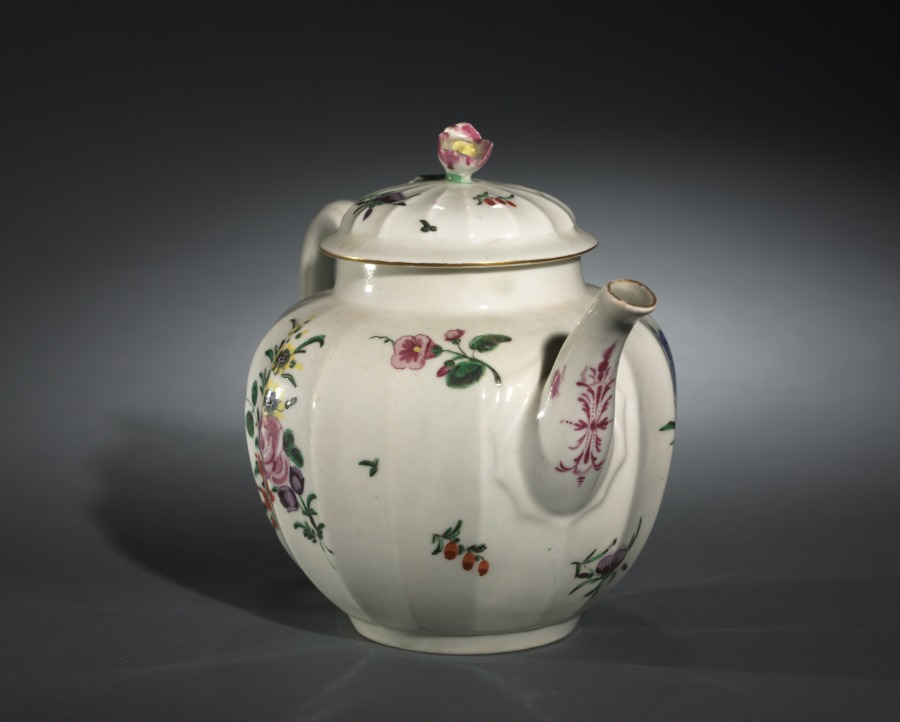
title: Teapot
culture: England, Worcester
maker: Worcester Porcelain Factory (British, established 1751)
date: c. 1755–75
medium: porcelain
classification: Ceramic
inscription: Mark on the bottom - An X with radiating lines inside a box.